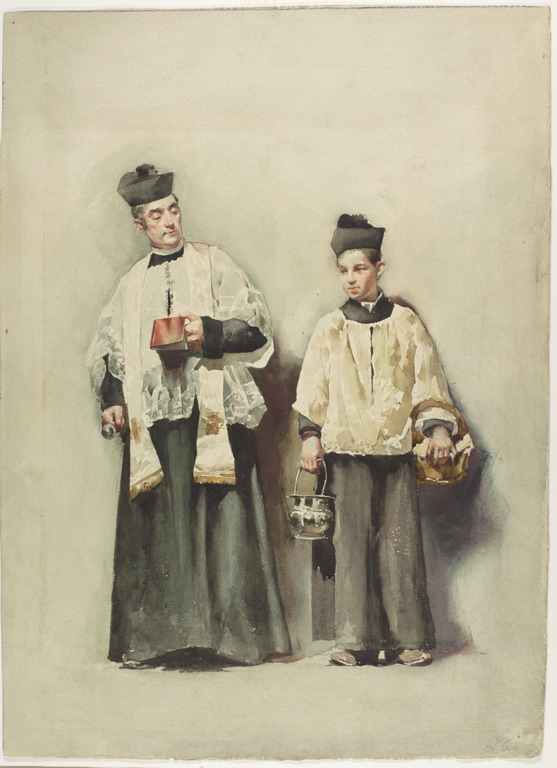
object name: Drawing and Watercolor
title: Priest and Boy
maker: Lawrence Carmichael Earle (American, 1845-1921)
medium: Watercolor over graphite on cream wove paper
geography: United States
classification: drawings (visual works); prints and drawing